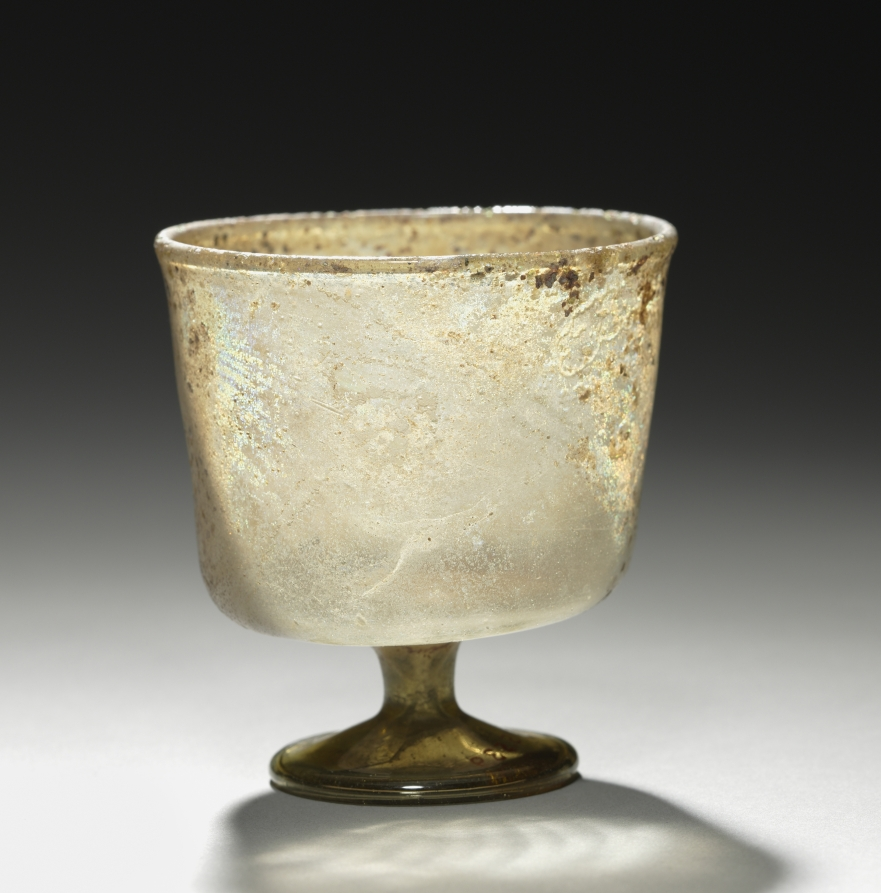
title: Stemmed Cup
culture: Syro-Palestinian, 6th-7th century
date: 500s-600s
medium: glass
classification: Glass